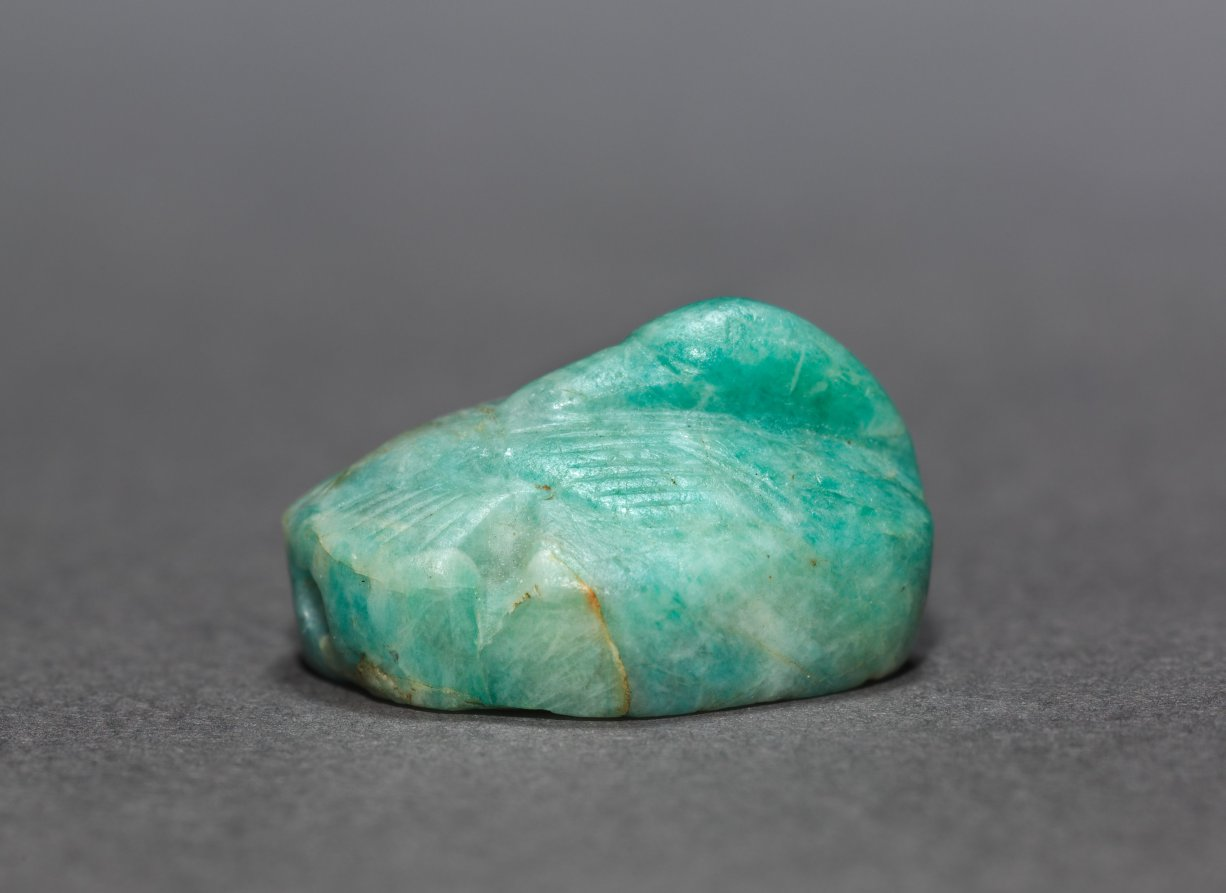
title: Sleeping Duck Amulet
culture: Egypt, New Kingdom (1540–1069 BCE), Dynasty 18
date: 1540–1295 BCE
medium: feldspar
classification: Amulets